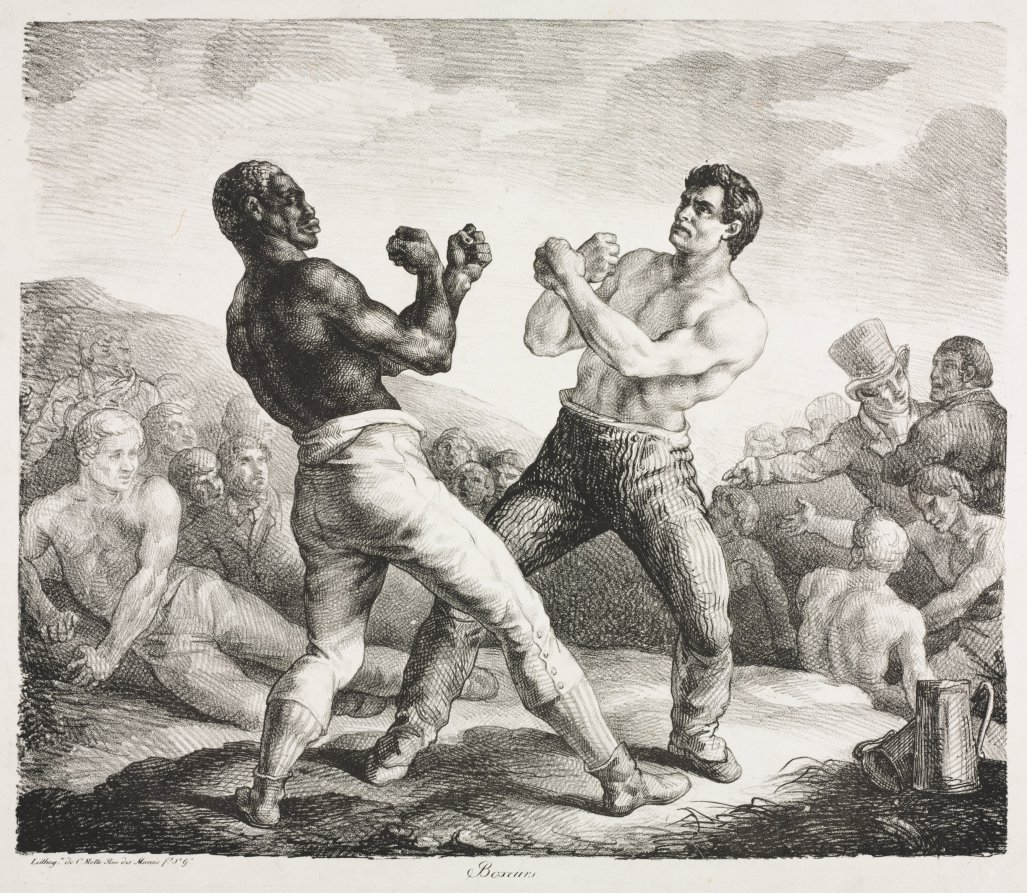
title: Boxers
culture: France, 19th century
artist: Théodore Géricault (French, 1791–1824)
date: 1818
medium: lithograph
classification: Print